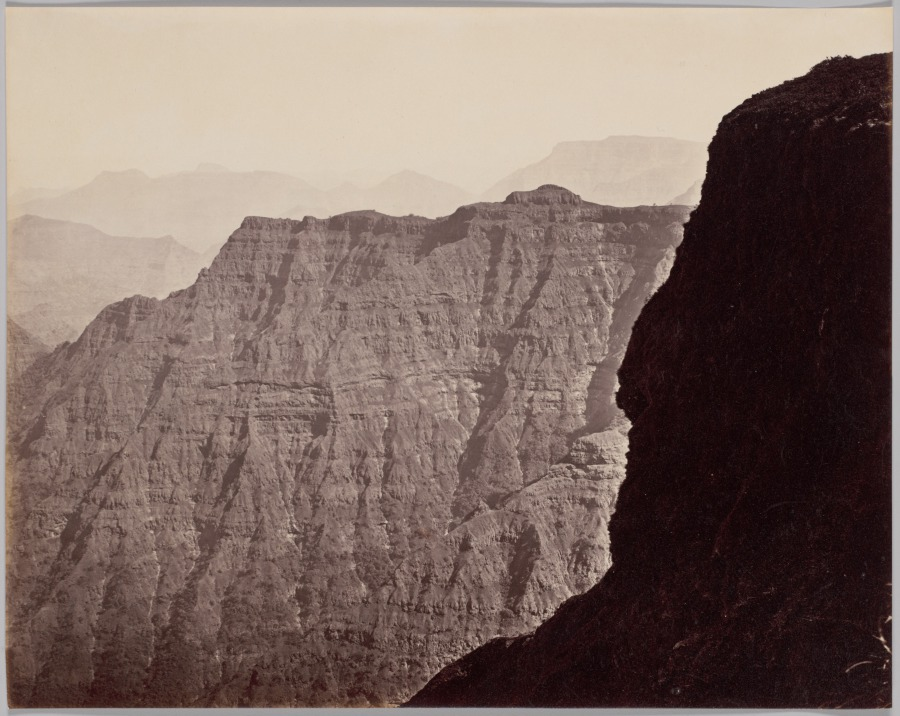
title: View of Hills near Mahabaleshwar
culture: England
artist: Colin Murray (British, 1840–1884)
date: early 1870s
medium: albumen print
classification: Photograph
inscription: Written in pencil on verso: “2441”